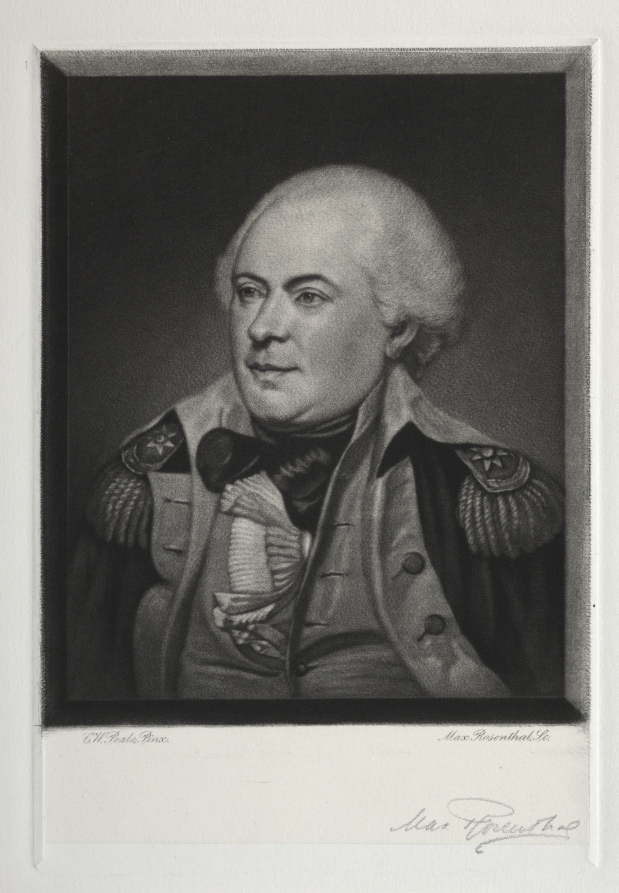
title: General James Wilkinson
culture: America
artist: Max Rosenthal (American, 1833–1918)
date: c. 1900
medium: mezzotint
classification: Print